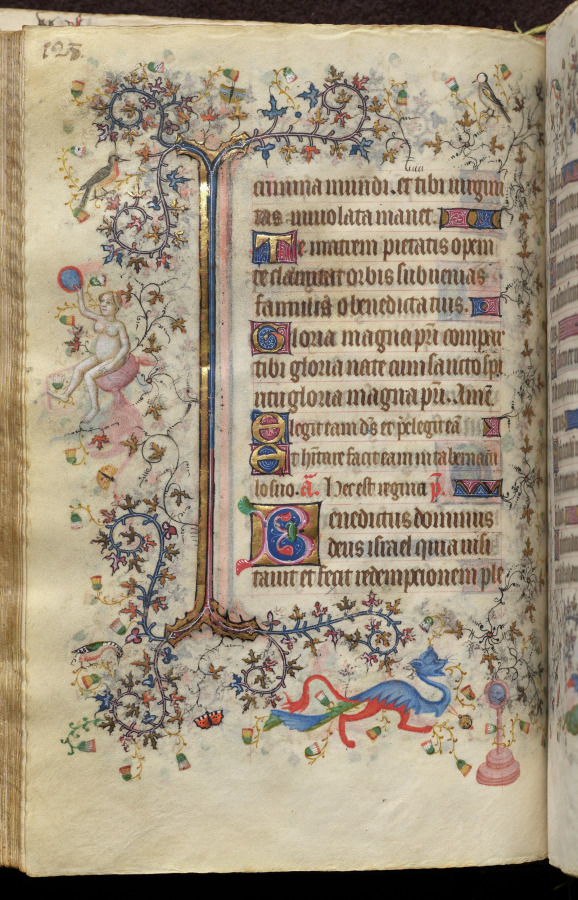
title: Hours of Charles the Noble, King of Navarre (1361-1425): fol. 64v, Text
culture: France, Paris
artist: Master of the Brussels Initials and Associates (French)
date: c. 1405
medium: ink, tempera, and gold on vellum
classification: Bound Volume